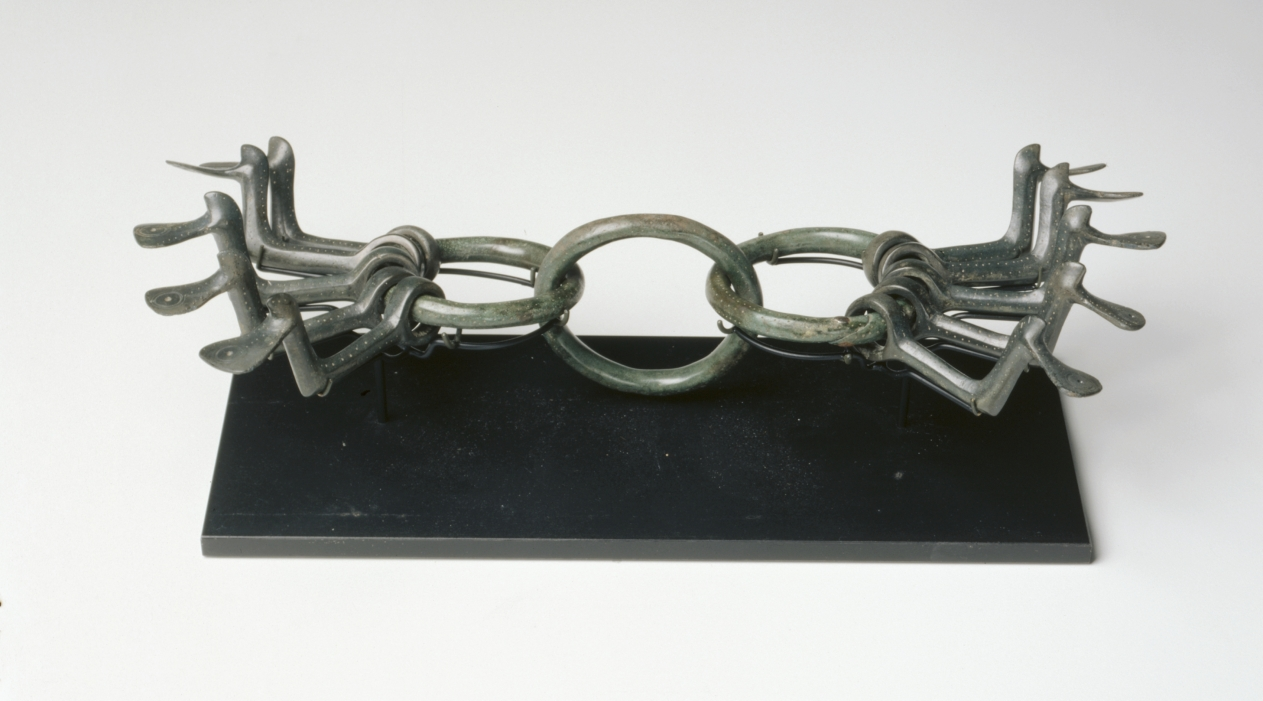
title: Cauldron Ornament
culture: Central Europe, Bronze Age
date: c. 1200 BCE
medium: bronze with iron rivets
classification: Metalwork